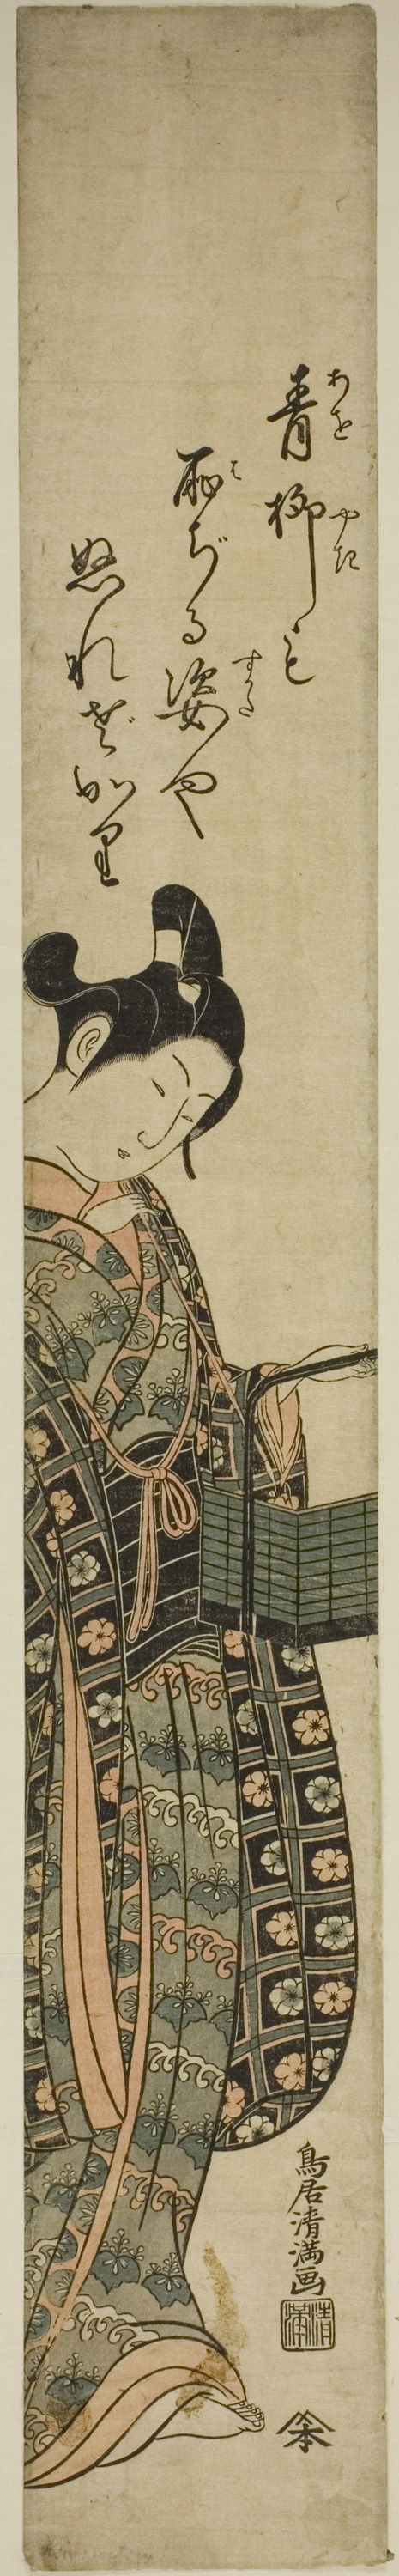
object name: Print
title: Woman Holding Basket with Tabacco Pipe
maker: Torii Kiyomitsu; Japanese, 1735-1785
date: 1760s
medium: Color woodblock print; hashira-e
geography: Japan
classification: woodblock print; print; asian art